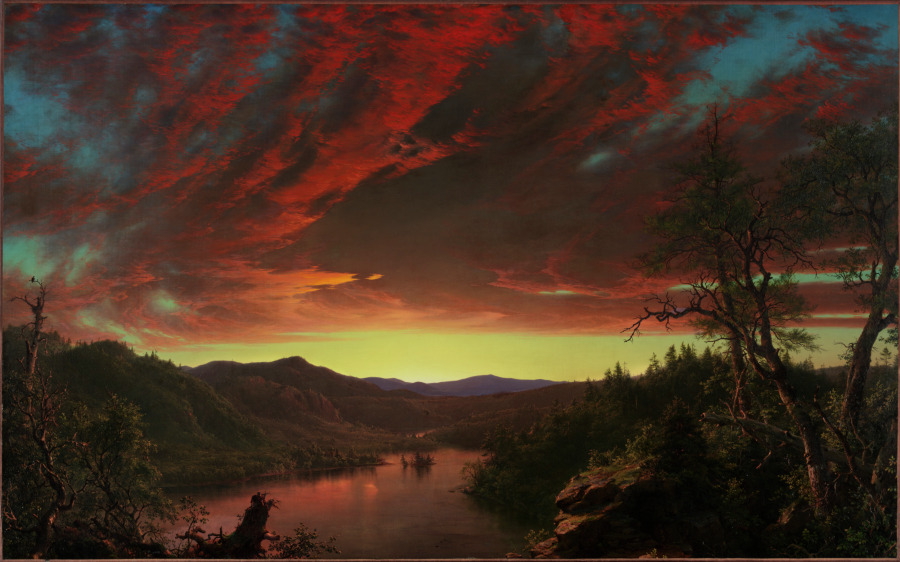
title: Twilight in the Wilderness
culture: America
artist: Frederic Edwin Church (American, 1826–1900)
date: 1860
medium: oil on canvas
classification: Painting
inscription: Signed and dated lower right: "F. E. CHURCH / -60-"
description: In his New York studio, Church painted this spectacular view of a blazing sunset over wilderness near Mount Katahdin in Maine, which he had sketched during a visit nearly two years earlier. Although Church often extolled the grandeur of American landscape in his work, this painting appears to have additional overtones. Created on the eve of the Civil War, the painting's subject can be interpreted as symbolically evoking the coming conflagration. Church's considerable technical skills and clever showmanship contributed to his fame as the premier artist of his generation. Rather than debut this painting in an annual exhibition with works by other artists as was the custom, Church instead exhibited it by itself at a prestigious art gallery. Coaxed by advance publicity and highly favorable press reviews, several hundred spectators flocked to admire it during its seven-week run.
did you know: An image of this painting has a cameo in the Harrison Ford film Clear and Present Danger.